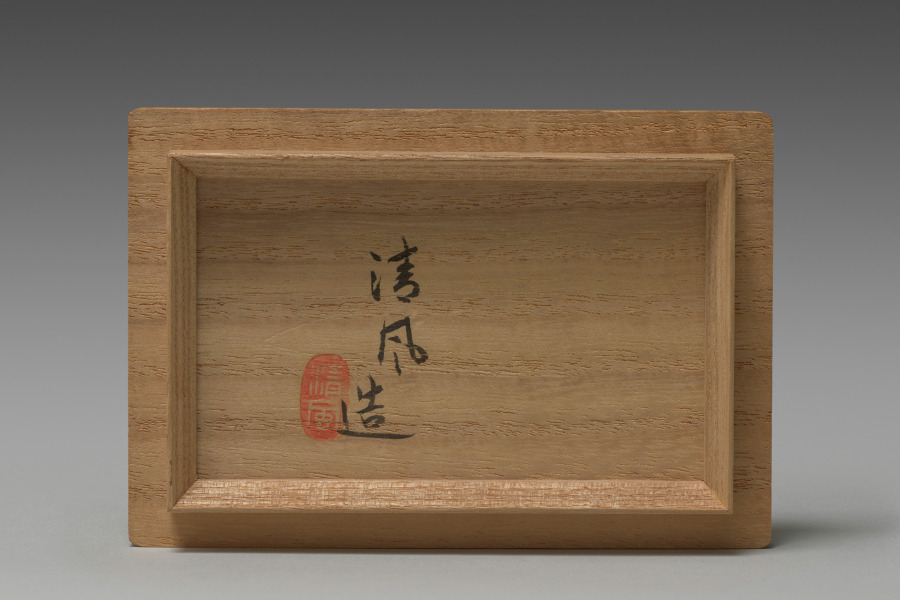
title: Sake Pourers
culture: Japan, Taishō period (1912–26) or Shōwa period (1926–89)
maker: Seifū Yohei IV (Japanese, 1872–1951)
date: 1914–46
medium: Pair of sake pourers; porcelain with yellow glaze and bamboo handles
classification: Ceramic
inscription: 清風造 。 【印】 清風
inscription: 成山清風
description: Like his father, Yohei IV also produced works with red or yellow monochrome glazes. His yellow-glazed works include this pair of sake pourers, a set of five drinking cups CMA 2022.217, and a sweets bowl molded into the shape of a chrysanthemum CMA 2022.218.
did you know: The lid's handle is made of bamboo.